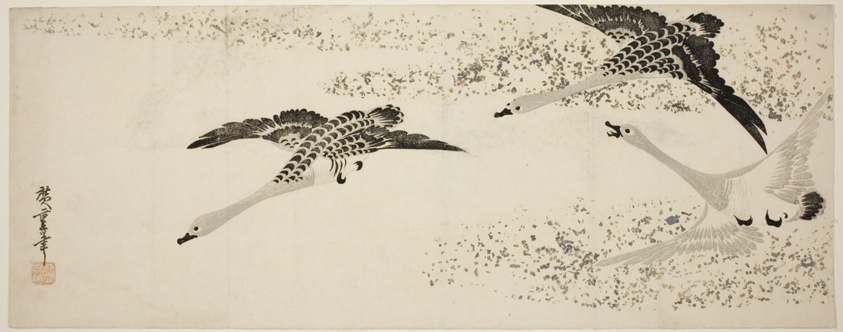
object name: Print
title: Descending Geese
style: Japanese (culture or style)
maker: Utagawa Hiroshige 歌川 広重; Japanese, 1797-1858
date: c. 1830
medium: Woodblock print; nagaban, surimono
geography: Japan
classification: woodblock print; print; asian art; woodblock